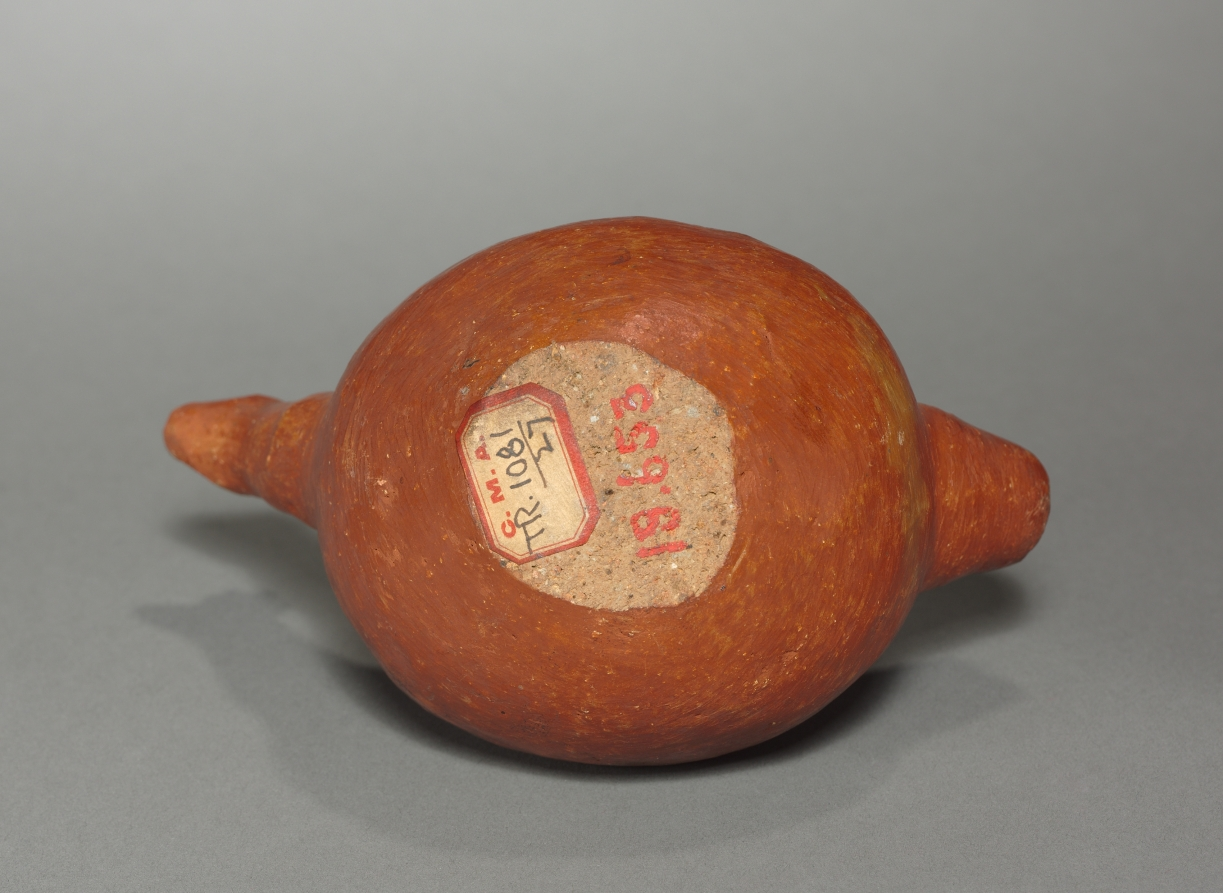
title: Bottle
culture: Peru, 20th century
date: 1900–1920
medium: pottery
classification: Ceramic